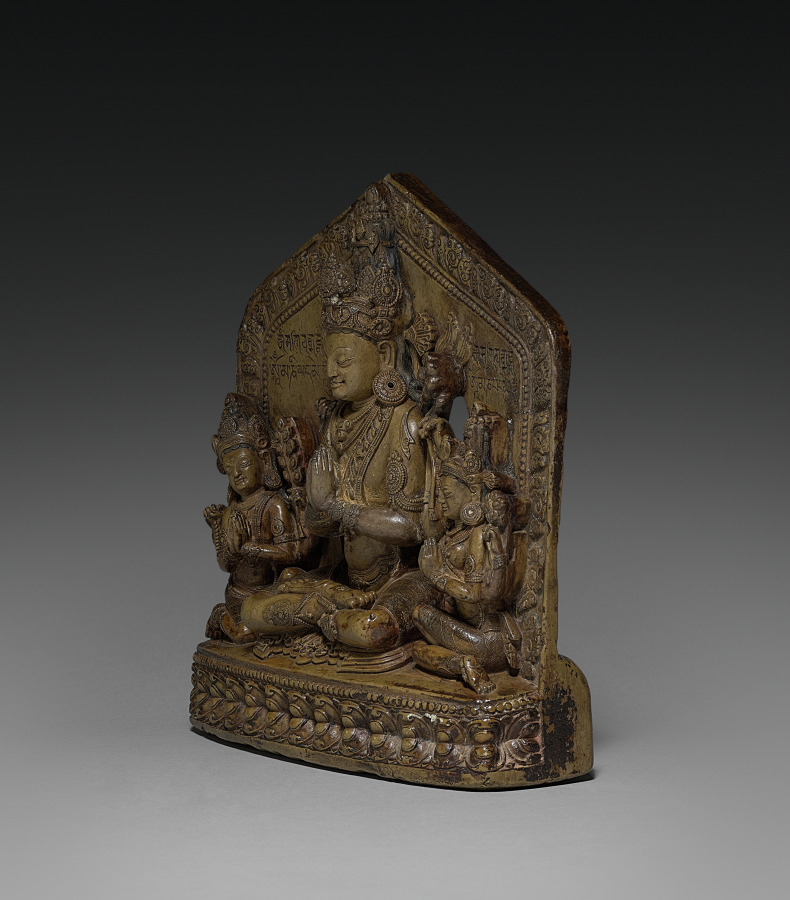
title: Stele with Sadaksari-Lokesvara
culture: Tibet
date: c. 1200s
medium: Kaolin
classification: Sculpture